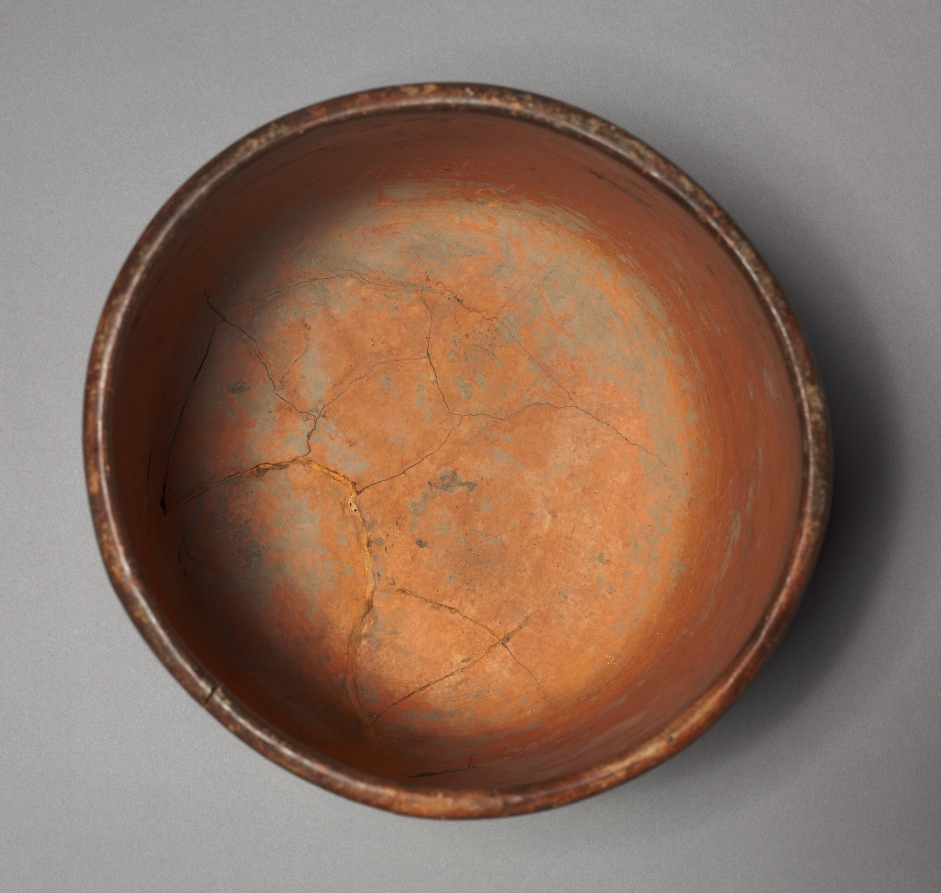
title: Vase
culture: Honduras, Maya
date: 250–900 CE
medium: earthenware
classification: Ceramic